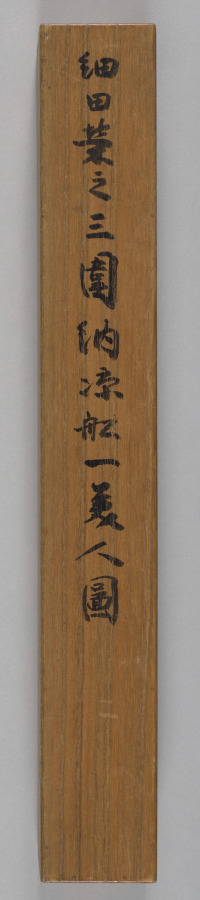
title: Beauty in a Boat on Sumida River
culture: Japan, Edo period (1615–1868)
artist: Chōbunsai Eishi (Japanese, 1756–1829)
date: c. 1801–4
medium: hanging scroll; ink and color on silk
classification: Painting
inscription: artist's signature 栄之筆 and seal, lower right.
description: The Sumida River was a popular refuge from the heat and humidity of the city during the summer. One can see the torii gate of Mimeguri Shrine just to the left of the woman's fan.